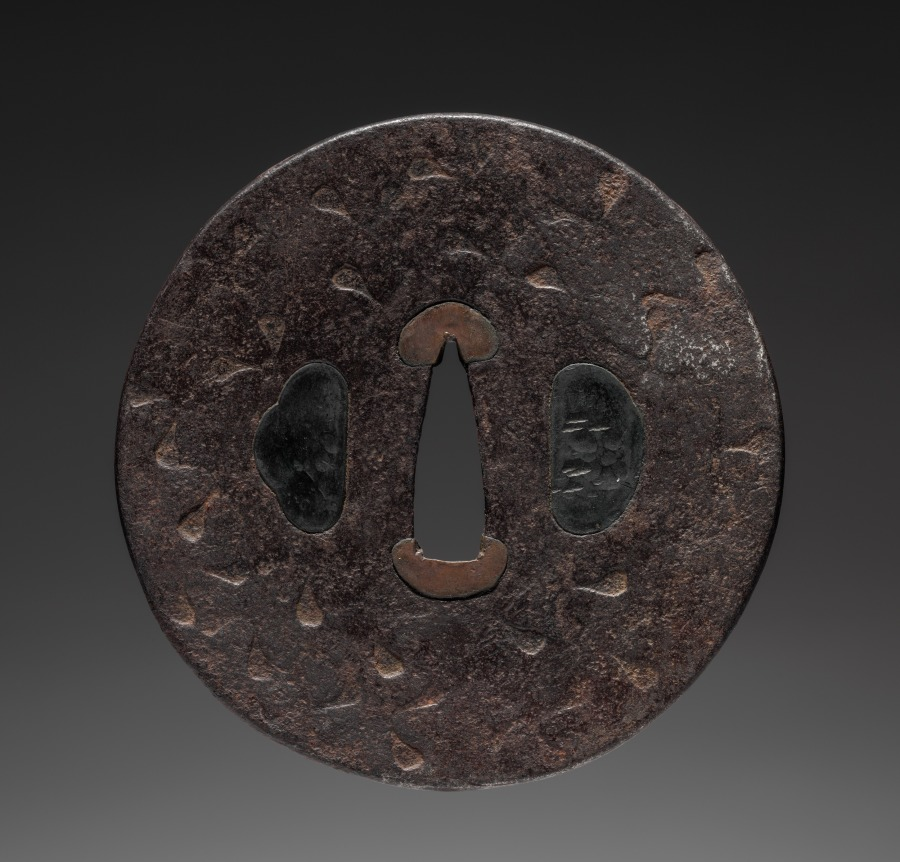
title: Sword Guard (Tsuba)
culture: Japan, Muromachi period (1392–1573)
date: 1500–1573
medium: iron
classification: Arms and Armor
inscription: Signature: Nobuiye